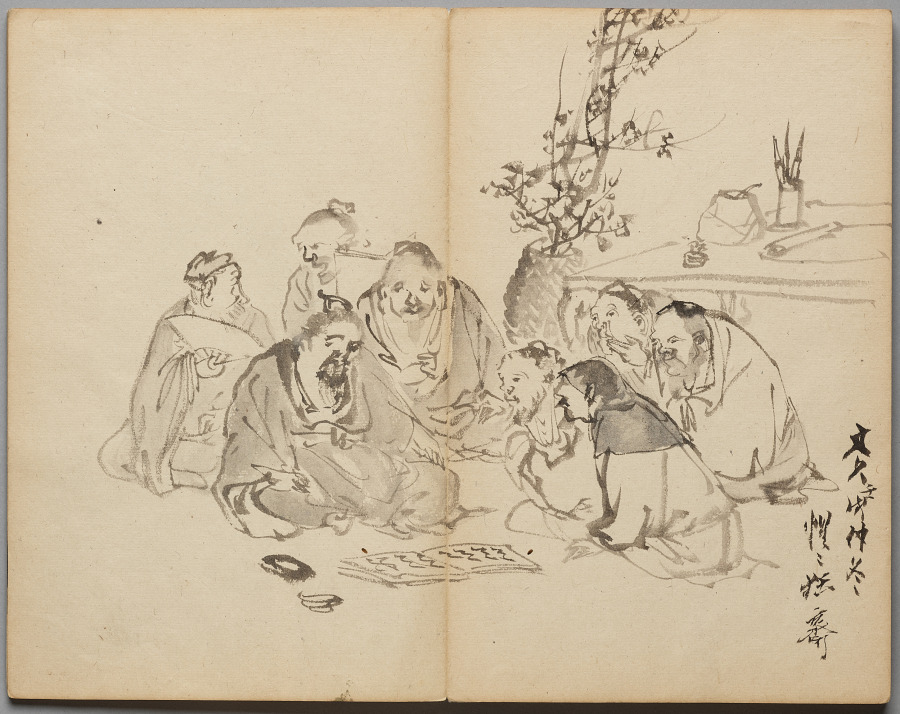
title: Scholars' Gathering from Sketch Album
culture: Japan, Edo period (1615–1868) to Meiji period (1868–1912)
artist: Kawanabe Kyōsai (Japanese, 1831–1889)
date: mid- to late 1800s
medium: Accordion-style book of 26 double-leaves; ink and color on paper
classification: Bound Volume